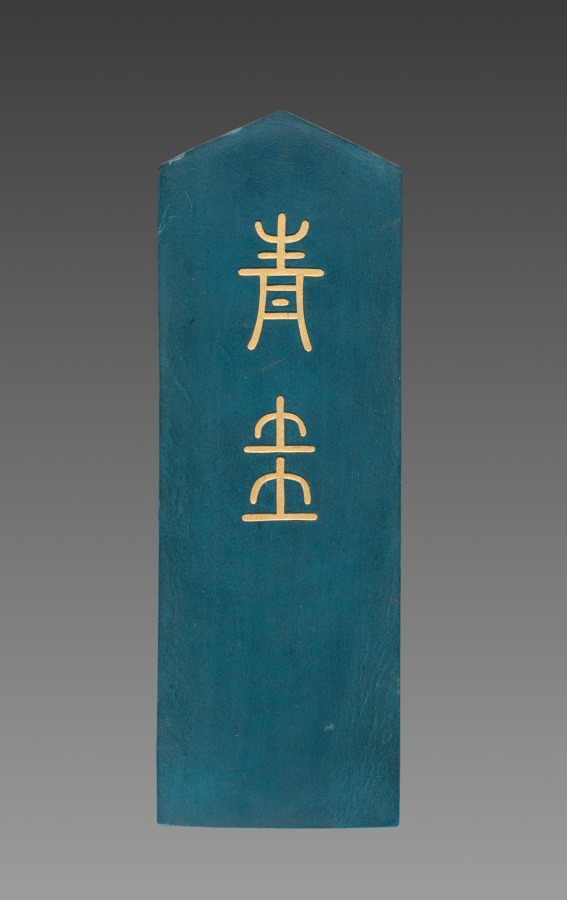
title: Box with Ink Cakes: Blue Ink Cake in Shape of a Gui Scepter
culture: China, Qing dynasty (1644-1911), Jiaqing reign (1795-1820)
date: 1795–1820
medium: Molded ink in blue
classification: Miscellaneous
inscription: 江西巡撫臣陳淮恭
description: Ink cakes (also called ink sticks) are dissolved with the addition of water and then ground on the surface of a flat square stone into liquid ink for painting and calligraphy. The precious ink cakes here, however, have never been used. The inscription on the side of the blue ink cake says that the set was commissioned by Chen Huai, Governor of Jiangxi Province.